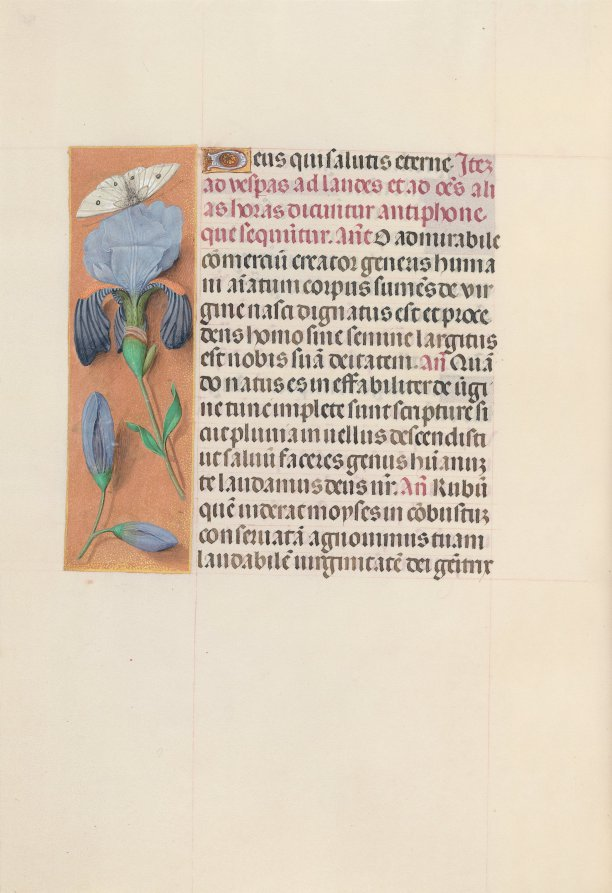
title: Hours of Queen Isabella the Catholic, Queen of Spain: Fol. 165v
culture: Flanders, Ghent and Bruges, late 15th century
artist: Master of the First Prayerbook of Maximillian (Flemish, c. 1444–1519)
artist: and Associates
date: c. 1500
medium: ink, tempera, and gold on vellum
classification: Bound Volume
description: This manuscript was illuminated by a circle of at least five highly organized manuscript painters active in the Flemish cities of Ghent and Bruges. The principal illuminator was Alexander Bening, who painted the majority of the book's miniatures. Manuscripts produced by this circle of artists are renowned for the decoration of their borders, which typically feature a rich variety of realistically-painted flowers, birds, and butterflies. This prayer book, called a book of hours, was intended not for a cleric, but for the private devotions of a lay person-in this case, Isabella the Catholic, Queen of Spain (1451-1504). Isabella's coat of arms embellishes the book's frontispiece. It is unlikely that the book was commissioned by the Queen herself; rather, she probably received it as a diplomatic gift from someone courting her patronage, perhaps Cardinal Francisco Jimenez de Cisneros. A Franciscan friar, Jimenez was dependent upon Isabella for his advancement, first to the post of Queen's confessor in 1492, and then to Archbishop of Toledo in 1495.